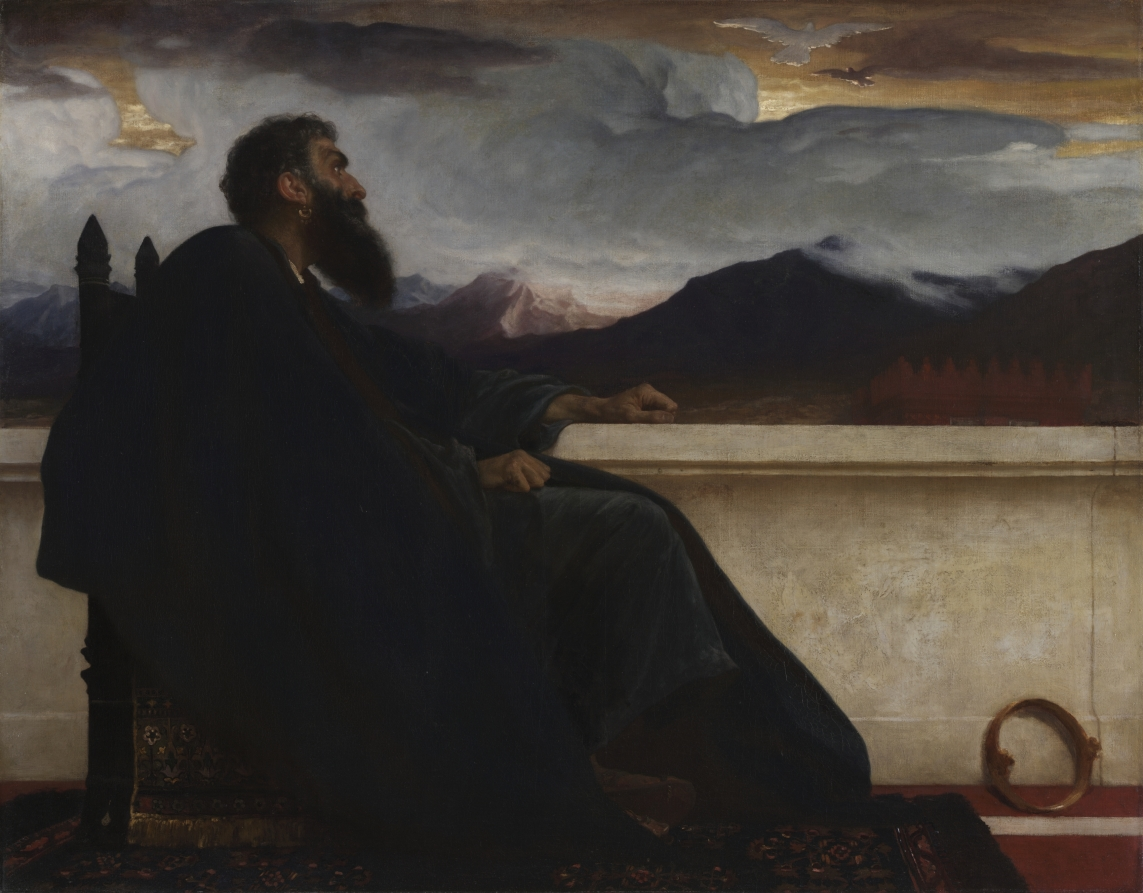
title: David: "Oh, that I had wings like a Dove! For then would I fly away, and be at rest." Psalm 55:6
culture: England, 19th century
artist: Frederic Leighton (British, 1830–1896)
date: 1865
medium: oil on fabric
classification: Painting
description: From the many events in the turbulent life of the biblical King David, Leighton chose to depict his moment of gravest doubt. Having just learned of the death of his rebellious son Absalom at the hands of his own army, David has withdrawn to a chamber above the city gate. Casting aside his crown, which lies on the floor, the ruler muses on the conflicting demands of family and nation.